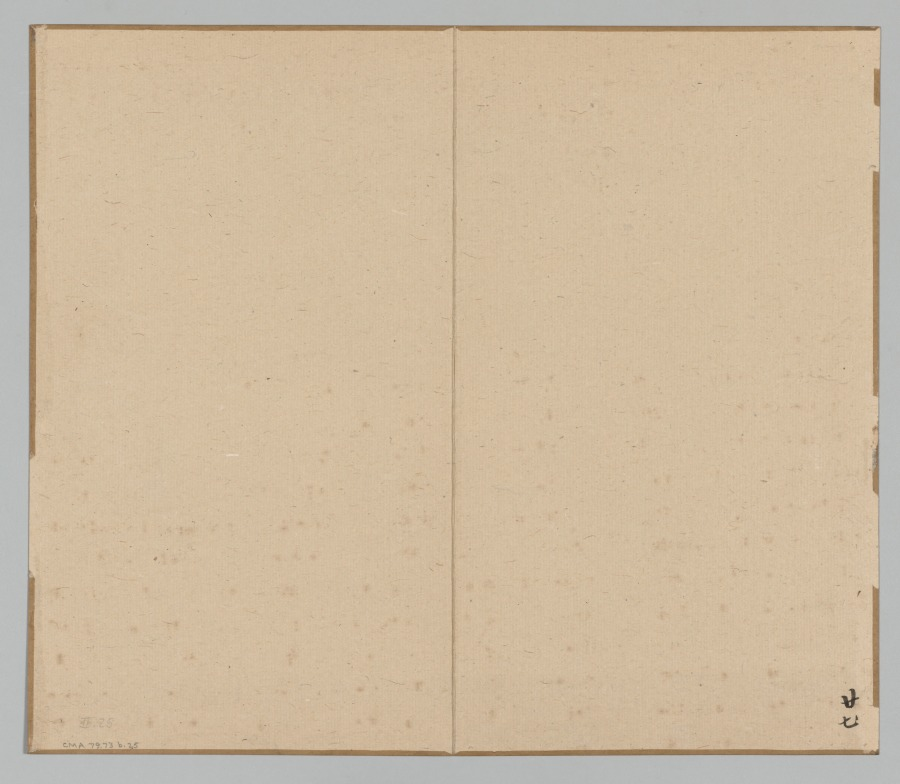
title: Reverberations of Taiga, Volume 2 (leaf 25)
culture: Japan, Edo period (1615–1868)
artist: Aoki Shukuya (Japanese, d. 1802)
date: mid-1700s–1802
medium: double-leaf from a pair of albums; ink and light color on paper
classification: Portfolio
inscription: 江楼賞月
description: Aoki Shukuya was a top student of painter Ike Taiga and took responsibility for Taiga’s stylistic legacy. A painting album by Taiga, part of which survives today in Kyoto in hanging scroll format, served as the source for this painting by Shukuya and the matching designs from a set of wood-block–printed volumes published in 1804. The postscript to the books, written and carved by the scholar Minagawa Kien (皆川淇園) (1735–1807), explains that Taiga produced the original album for his wife and fellow painter Tokuyama Gyokuran (徳山玉瀾) (1727/28–1784). The final design in the first volume of the books and Shukuya’s corresponding painting include the text “viewing the moon from a river pavilion” (江楼賞月). The scene alludes to a poem by Tang dynasty (618–907) poet Zhao Gu (趙嘏) (Chinese, active mid-800s). In the poem, a person gazes at the moon from a riverside pavilion and reflects on the absence of a companion who had admired it with him at the same place the year before.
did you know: Traditionally, young painters in Japan began their studies with an established master painter. The master's compositions invariably became models that the apprentice copied to learn various ink and brush techniques.